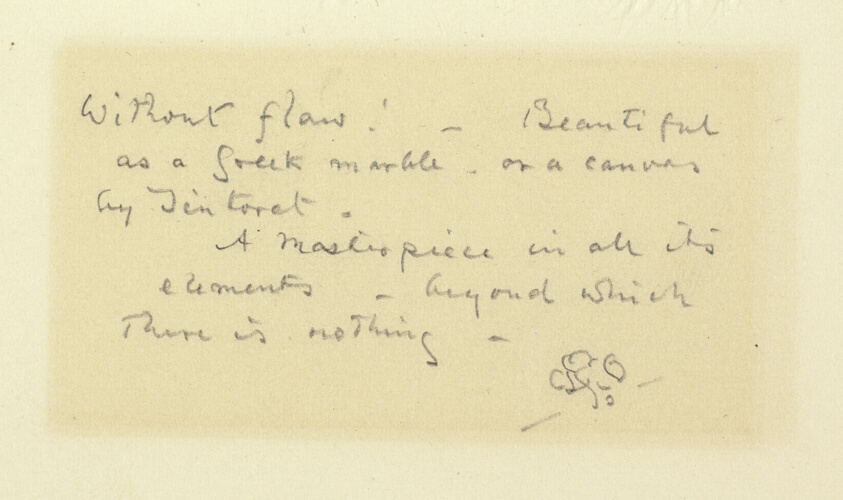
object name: Drawing and Watercolor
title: Whistler inscription and butterfly formerly on mat of Rembrandt's Clement de Jonghe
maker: James McNeill Whistler (American, 1834-1903); referring to Rembrandt van Rijn (Dutch, 1606-1669)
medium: Graphite on cream card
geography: United States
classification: graphite; prints and drawing; drawings (visual works); paper